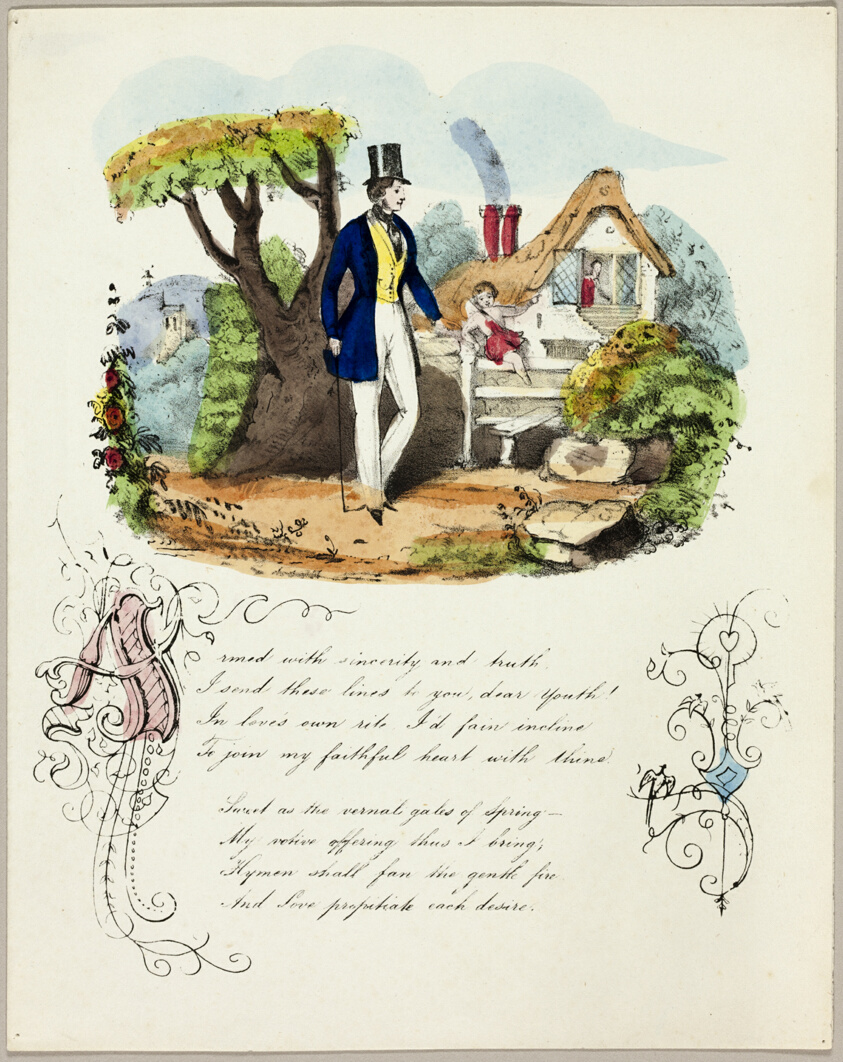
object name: Print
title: Armed with Sincerity and Truth (valentine)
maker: Unknown Artist; English, 19th century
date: c. 1842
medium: Lithograph with hand-coloring on ivory wove paper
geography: England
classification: valentine; prints and drawing; print